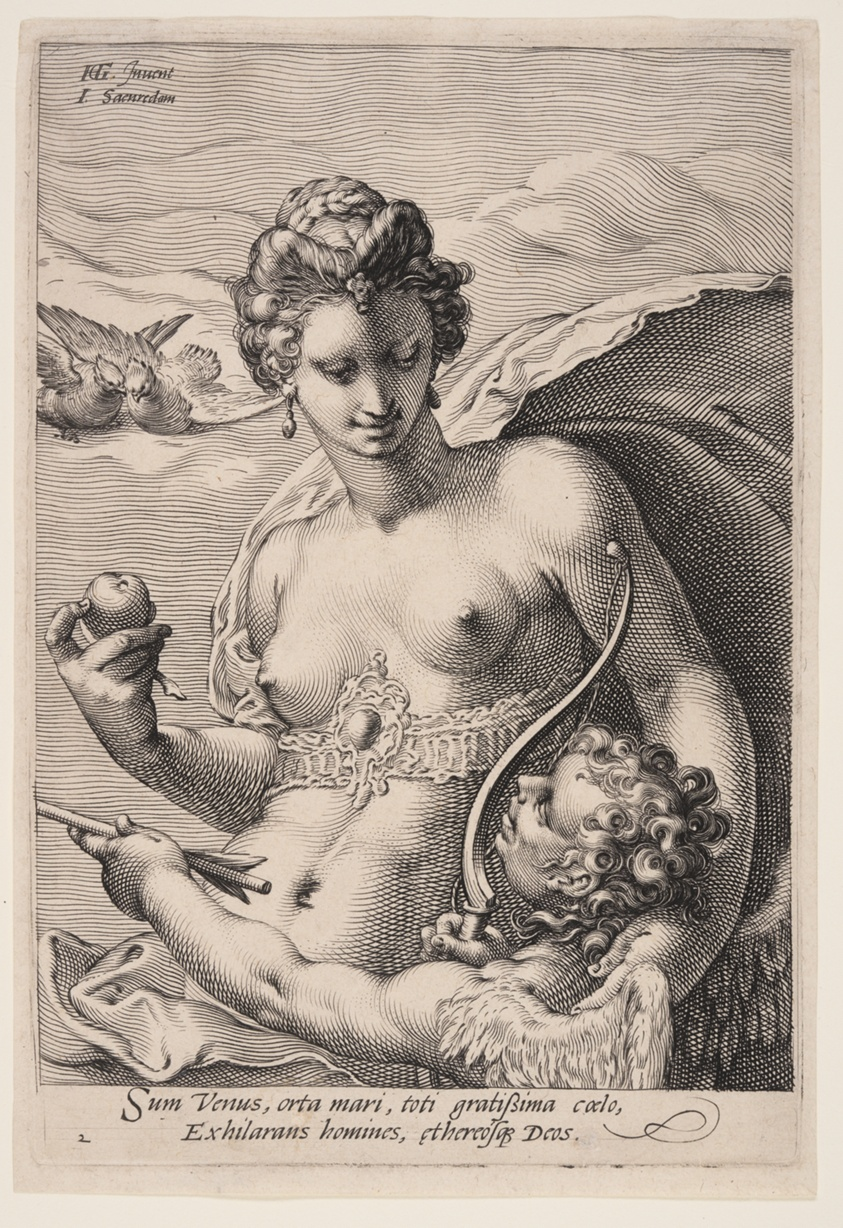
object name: Print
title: Venus and Cupid, from Three Goddesses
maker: Jan Saenredam (Dutch, 1565–1607); after Hendrick Goltzius (Dutch, 1558–1617)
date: c. 1595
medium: Engraving on laid paper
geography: Netherlands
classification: print; engraving; paper; prints and drawing